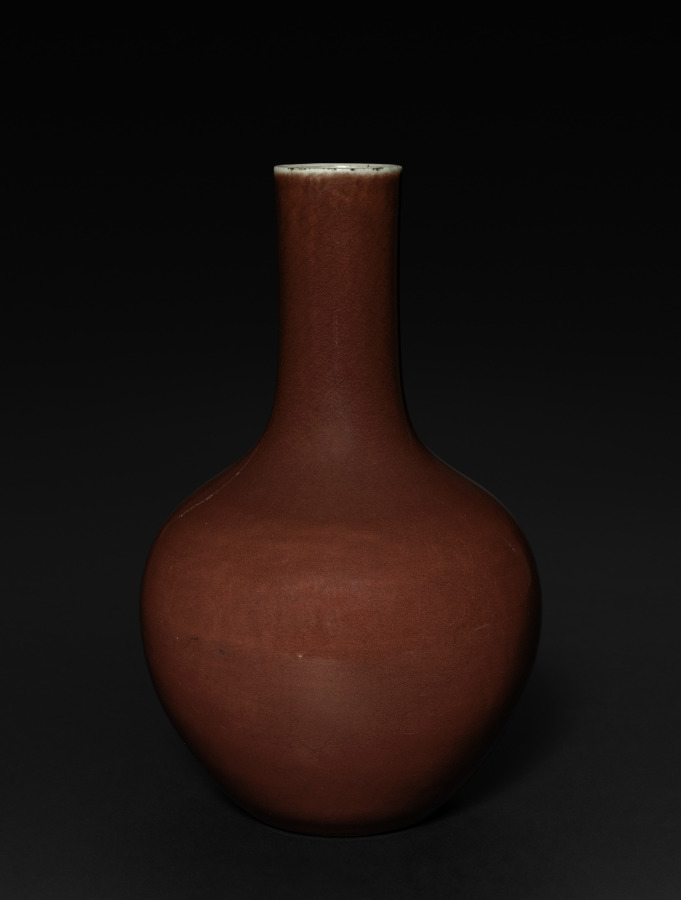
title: Bottle-shaped Vase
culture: China, Qing dynasty (1644–1911), Qianlong reign (1736–95)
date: 1736–95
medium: porcelain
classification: Ceramic